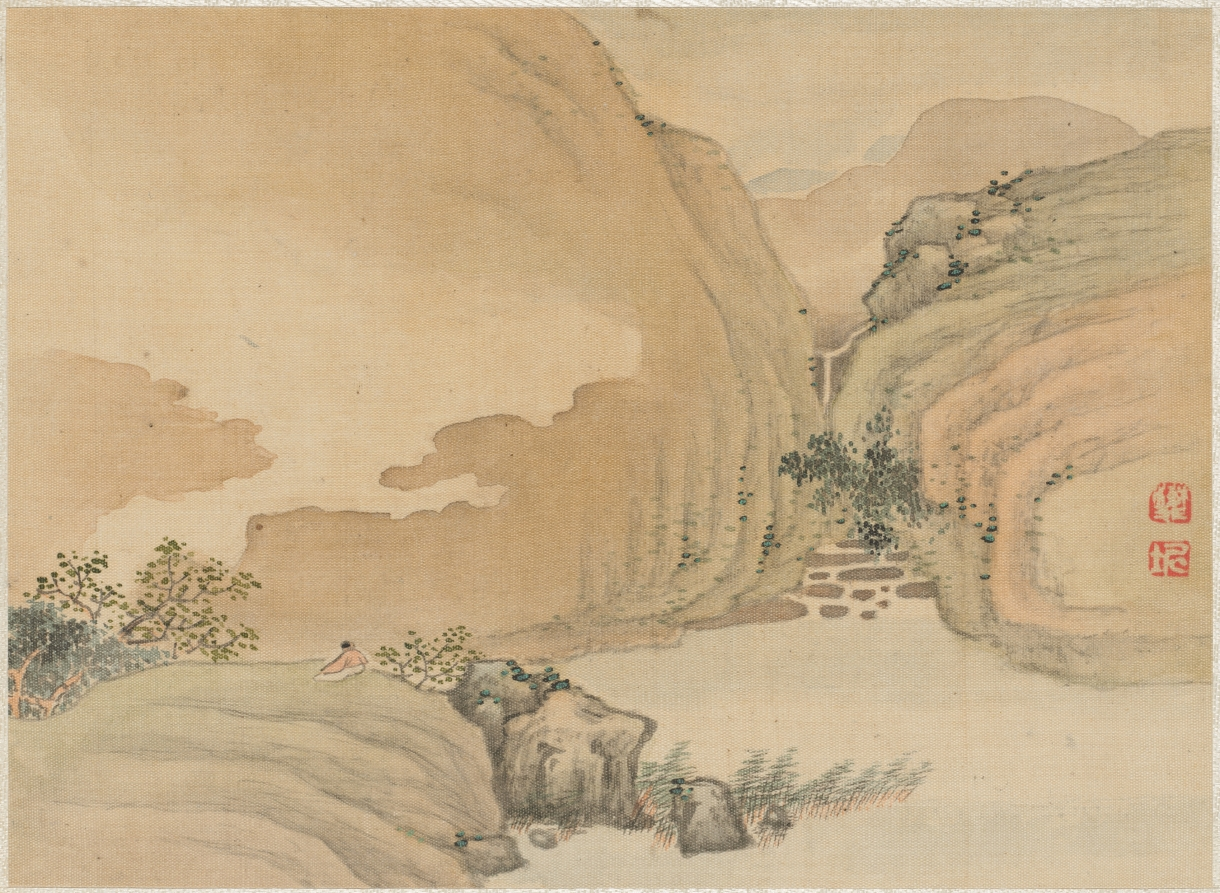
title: Album of Miscellaneous Subjects, Leaf 3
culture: China, Qing dynasty (1644-1911)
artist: Fan Qi (Chinese, 1616–after 1694)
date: early 1650s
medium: album leaf, ink and color on silk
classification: Painting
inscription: Artist seal: Fan Qi 樊圻. Poem by Xu Fang 徐枋 (1622–1694): Green are the reeds, the sun not yet set;/ Tree foliage and mountain colors divide the lake in two halves./ A solitary recluse sits upon a flat bluff,/ Occasionally observing white clouds rising from the mountain tops.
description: Fan Qi's painting for the third leaf of the album evokes Wang Wei's poetic line: Sit and watch the clouds rising. Xu Fang's calligraphic colophon reads: Green are the reeds, the sun not yet set; Tree foliage and mountain colors divide the lake into two halves. A solitary recluse sits upon a flat bluff, Occasionally observing white clouds rising from the mountain tops.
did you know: A waterfall descends between two mountains; the series of cascades is hinted by the careful placement of intermittent rocks.